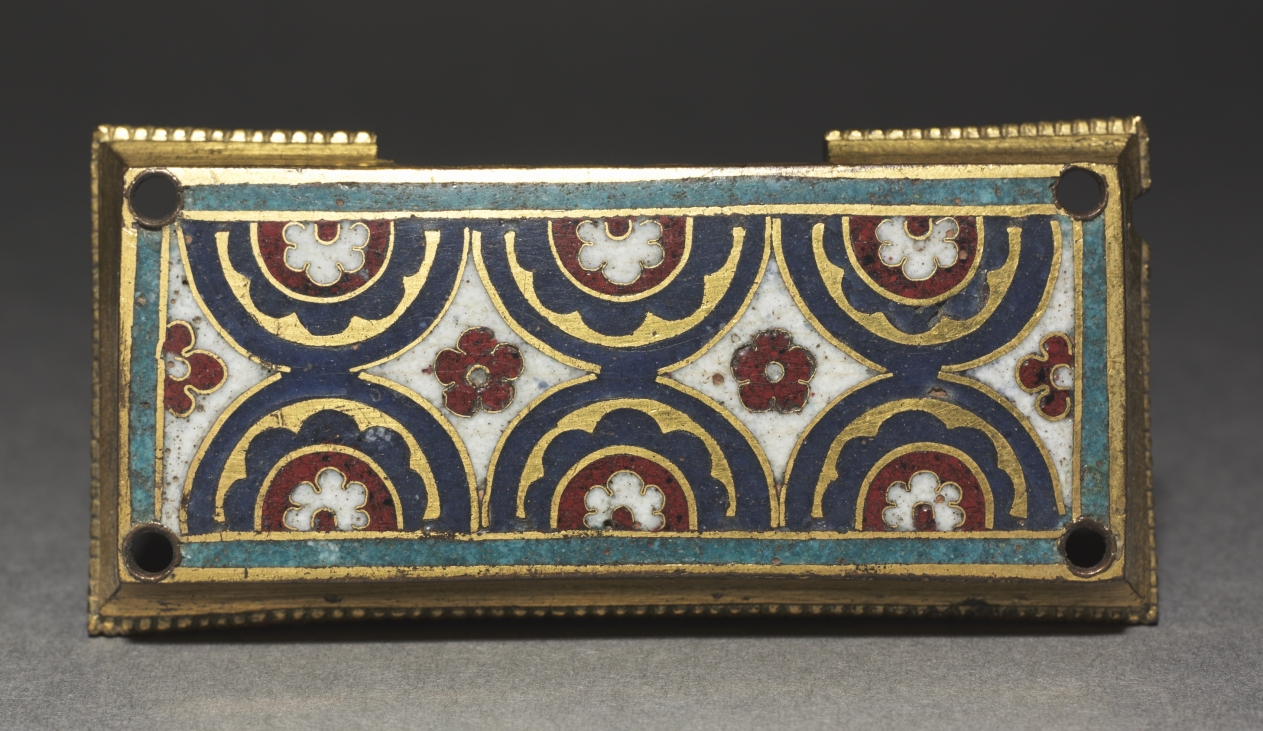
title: Plaque, probably from a Reliquary Shrine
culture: Germany, Rhine Valley, Cologne, Romanesque period, 12th century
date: c. 1180–1190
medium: gilded copper, champlevé and cloisonné enamel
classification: Enamel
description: This enamel plaque has been linked to the original decoration of the Shrine of the Three Kings in Cologne Cathedral, attributed to Nicholas of Verdun, one of the most important goldsmiths of the late 12th century.